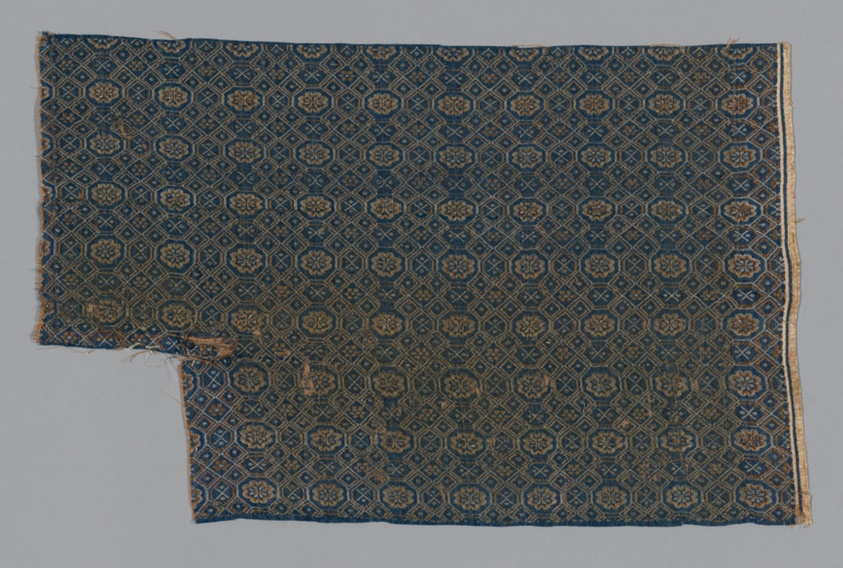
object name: Textile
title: Fragment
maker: Japan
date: Edo period (1615–1868), 1700/1750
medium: Fancy compound satin, silk and gilt paper; 2 1/2 strips to m.m.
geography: Japan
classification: weaving; textile